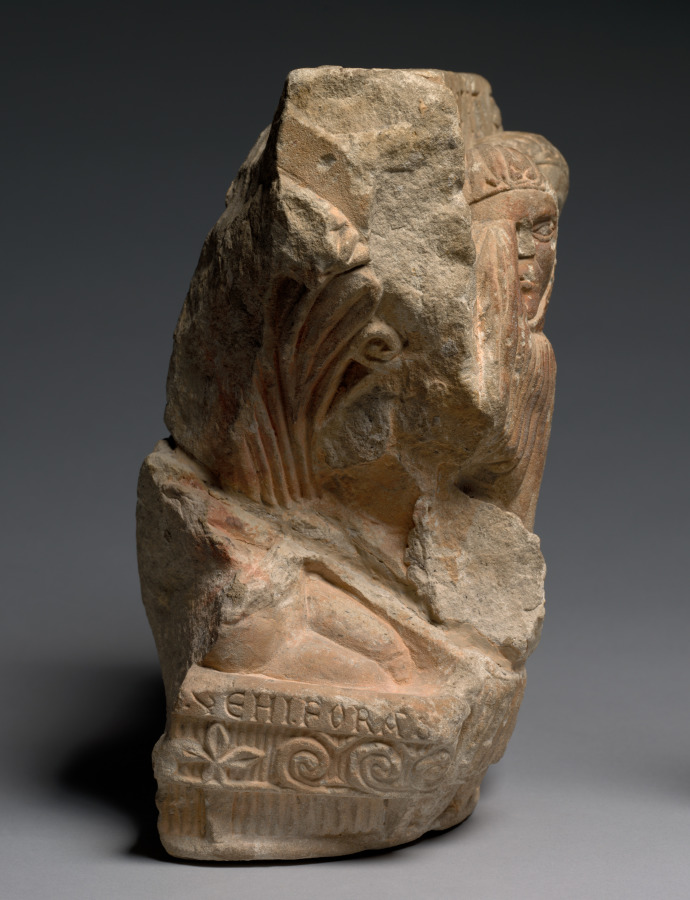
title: Fragment of a Double Capital: Mary and Martha at the Raising of Lazarus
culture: Southwest France, Ariège, region of Foix, mid-12th century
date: 1145–1165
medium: quartz sandstone with traces of polychromy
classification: Sculpture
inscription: inscription above the draped figures of Mary and Martha: "MARIA ET MARTA"; to the left of the two figures is a portion of a decorated sarcophagus depicted in the lower half with an inscription of Christ's words: "VENI FORAS" ([Lazarus] come forth).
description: The front face of this capital fragment presents the two mourning women identified by the inscription above: MARIA ET MARTA. On the left face appears the body of Lazarus in a sarcophagus bearing Christ's words: VENI FORAS ("[Lazarus], come forth" [John 11:43]). The Raising of Lazarus is one of the most popular themes in Christian art. This miracle represents Christ's power over death and thus prefigures the Resurrection. It also speaks of the hope of resurrection for all individuals, a common theme in early Christian catacombs and sarcophagi. The subject is less prevalent in sculpture of the Romanesque period, though quite popular in other media.